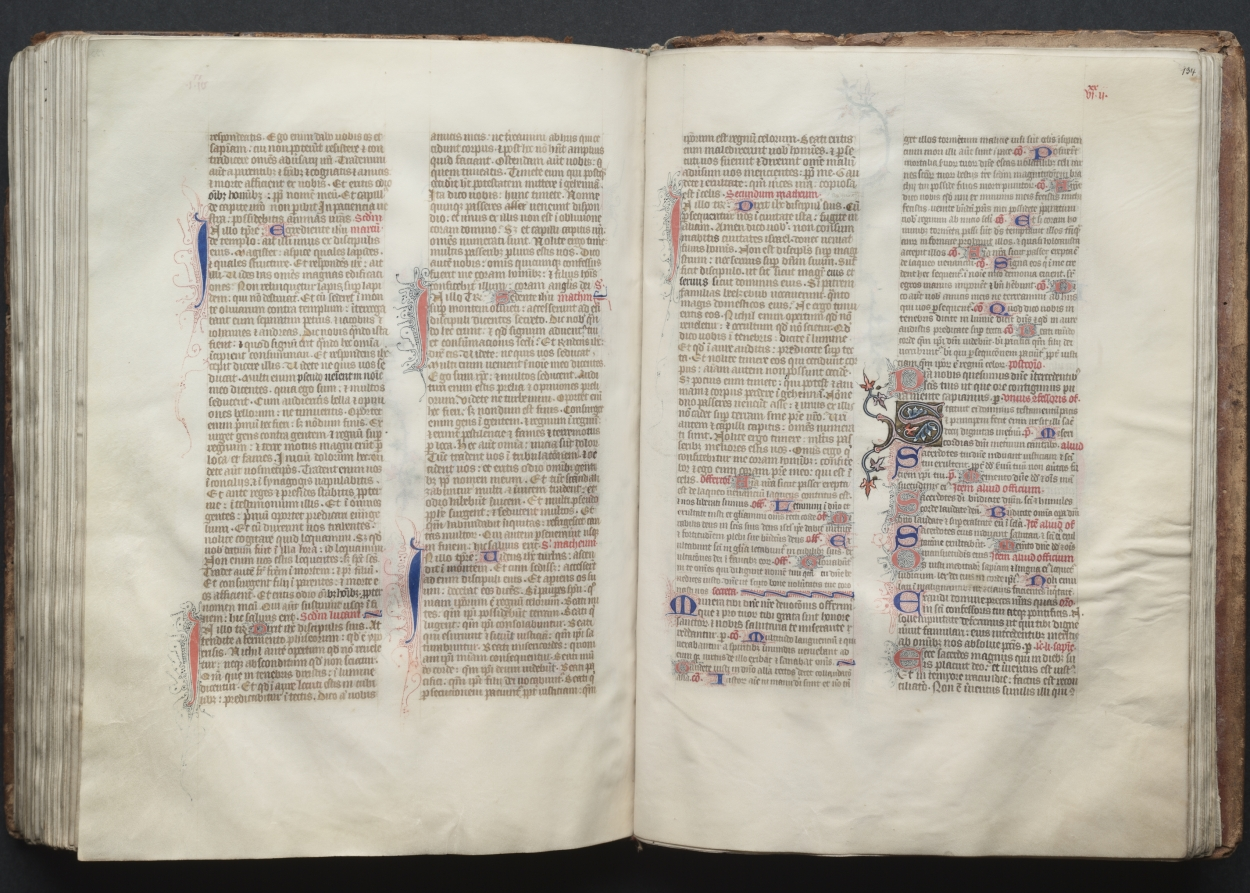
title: The Gotha Missal: Fol. 134r, Text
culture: France, Paris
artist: Master of the Boqueteaux (French)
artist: and Workshop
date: c. 1375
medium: ink, tempera, and gold on vellum; blind-tooled leather binding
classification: Bound Volume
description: The style and quality of this manuscript's decoration is typical of deluxe Parisian books made for aristocratic or royal patrons. Most of the book's decoration appears to be the work of the Master of the Boqueteaux, an artist active at the court of King Charles V (died 1380). His style was apparently shared by a number of book illuminators working in and around Paris. It is very possible that the Gotha Missal belonged to Charles V, but is not provable because the manuscript has no royal portraits and lacks a colophon. Given the book's magnificent decoration, however, it would seem that it was produced for a Valois prince, if not for the king himself. The manuscript receives its name from the German dukes of Gotha, its later owners.